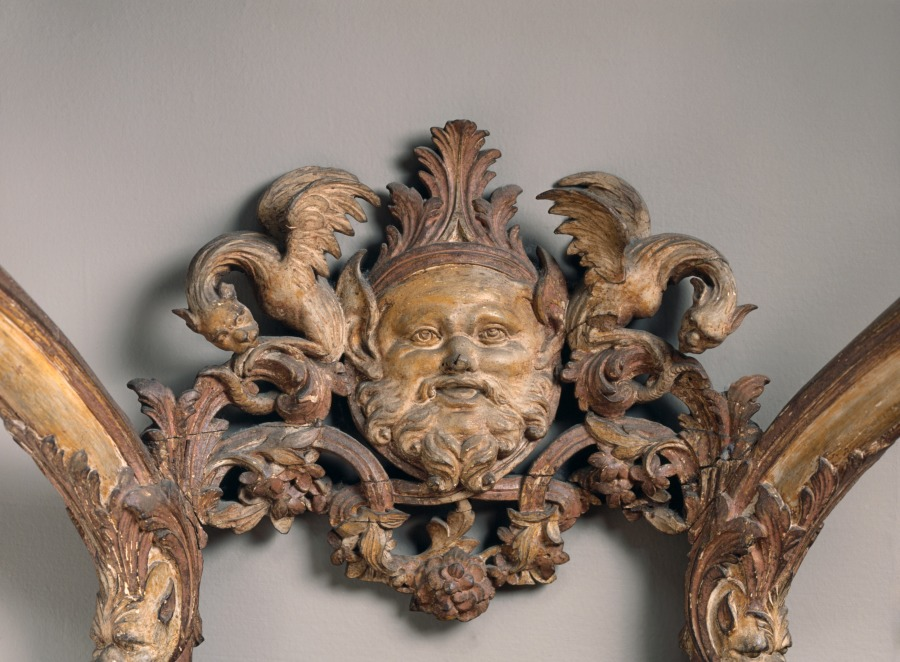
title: Console Table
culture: France, 18th century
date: c. 1720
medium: carved and painted wood, marble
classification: Furniture and woodwork